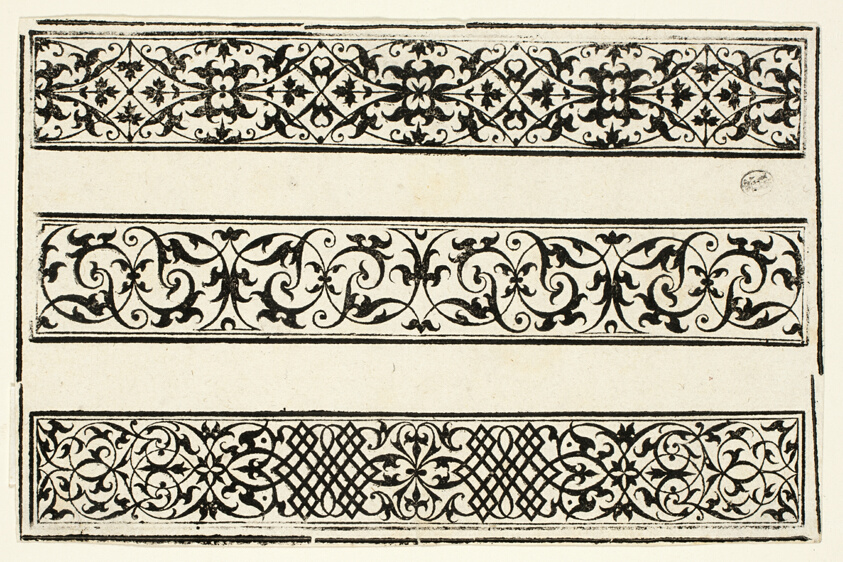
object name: Print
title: Ornamental Panels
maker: Hans Rudolf Manuel Deutsch (Swiss, 1525-1572); printed by Andrea Gessner (Swiss/German, born 1560)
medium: Woodcut in black on paper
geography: Switzerland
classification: woodcut; print; prints and drawing